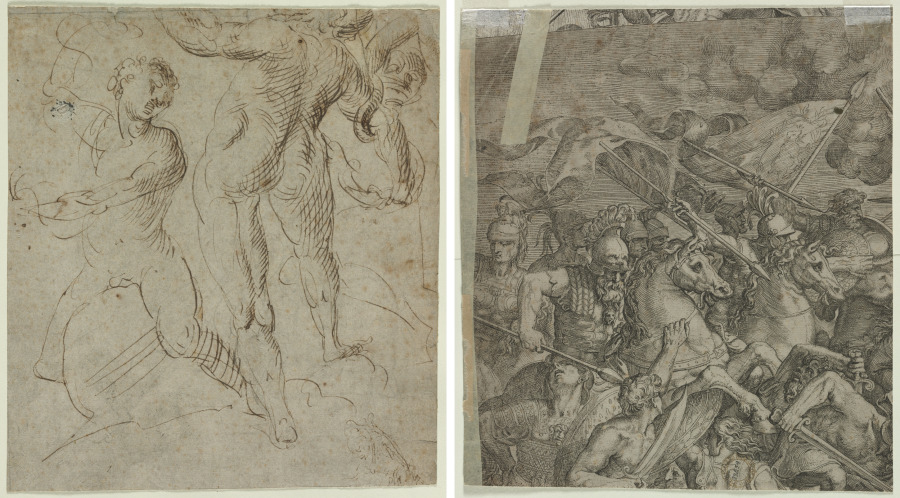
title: Laocoön (recto); Battle of the Milvian Bridge (fragment) (verso)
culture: Italy, 16th century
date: second half 16th Century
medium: pen and brown ink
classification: Drawing